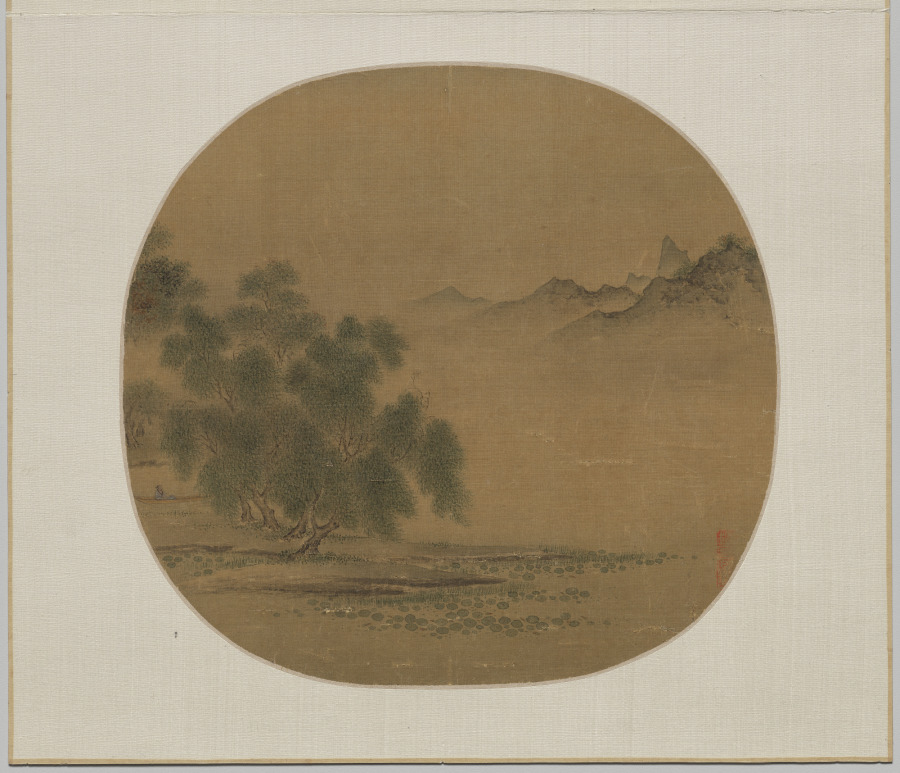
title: Willows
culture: China, Southern Song dynasty (1127–1279)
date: 1100s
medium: album leaf; ink and light color on silk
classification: Painting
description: A single scholar in a skiff drifts beneath shade-giving willows and savors his view of mountain peaks just emerging from the pervasive river mist. Round lotus leaves and vertical marsh reeds join with the dotted grasses and curving willow leaves to provide considerable textural variety within the foreground area, which contrasts with the more irregular texturing of the distant mountains. Misty space plays an active part in the composition, and the components of the painting are organized around bisecting diagonals.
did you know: This river scene features low-lying spits of land surrounded by lotuses and bands of mist floating amid overhanging willows.